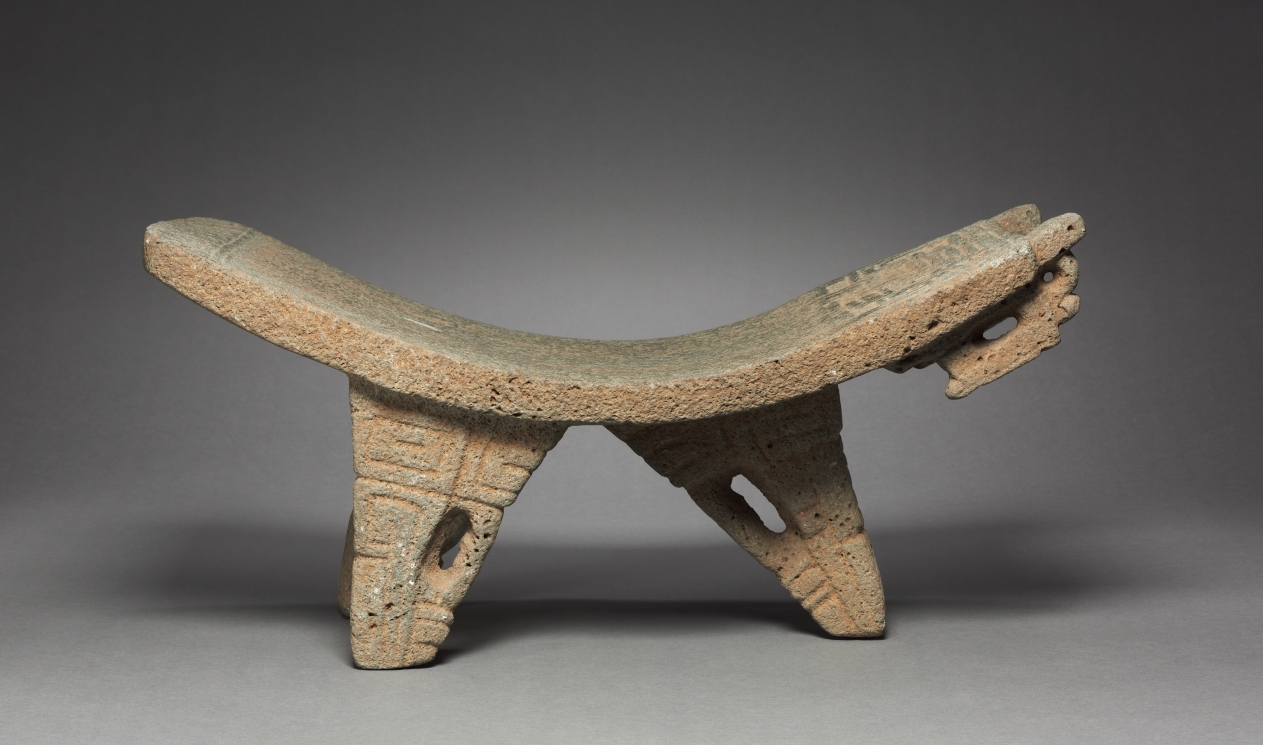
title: Metate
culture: Costa Rica, Guanacaste, northwest coast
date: 1200–1500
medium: gray volcanic stone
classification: Sculpture